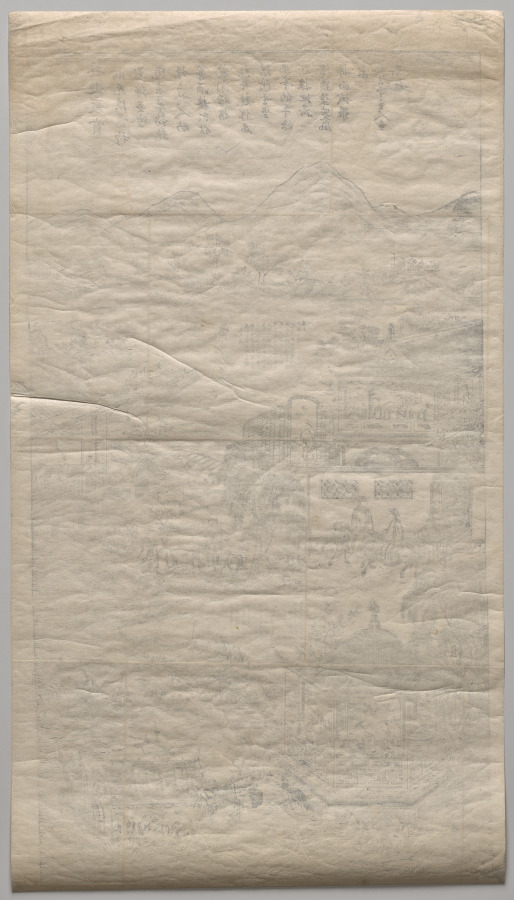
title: Touring in Spring, Enjoying Summer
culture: China, Qing dynasty (1644–1911), Qianlong reign (1736–95)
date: 1736–95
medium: Polychrome woodblock print; ink and color on paper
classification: Print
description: In the 1600s, printing flourished in such Jiangnan cities as Nanjing, Suzhou, Hangzhou, and Huizhou, evolving from privately enjoyed illustrated books printed in color to more commercialized single-sheet color prints that were hung on walls and became part of the rich urban visual culture.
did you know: Woodblock printing in color reached a height in China in the 1600s to 1700s. The prints were executed by means of sets of separate blocks, each carved to print a different color.